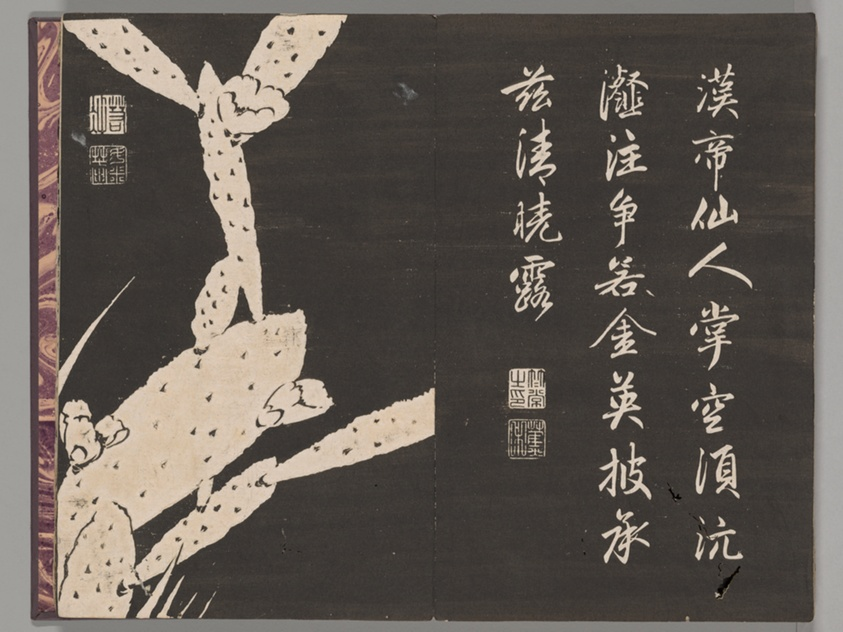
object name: Book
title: Soken sekisatsu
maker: Ito Jakuchu (Japanese, 1716-1800)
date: 1767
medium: Woodblock printed book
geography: Japan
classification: book